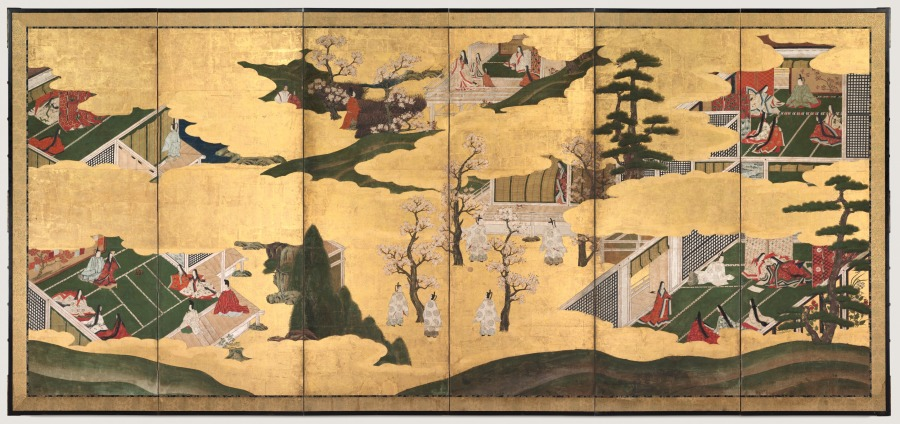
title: Scenes from the Tale of Genji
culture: Japan, Edo period (1615–1868)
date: late 1700s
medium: One of a pair of six-panel folding screens; ink and color on gilded paper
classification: Painting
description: Folding screens served as temporary dividers in traditional Japanese open-plan architectural spaces. This pair was inspired by Japan’s most celebrated work of literature, the Tale of Genji, written by Murasaki Shikibu, an attendant to the empress in the early 11th-century imperial court. The novel follows the love life of the “Shining Prince” Genji and delves into the psychological states of his many companions. Distinct episodes are nestled within a matrix of golden clouds and landscape elements. Each screen includes six episodes presented in a nonlinear fashion, capturing scattered highlights of the story.